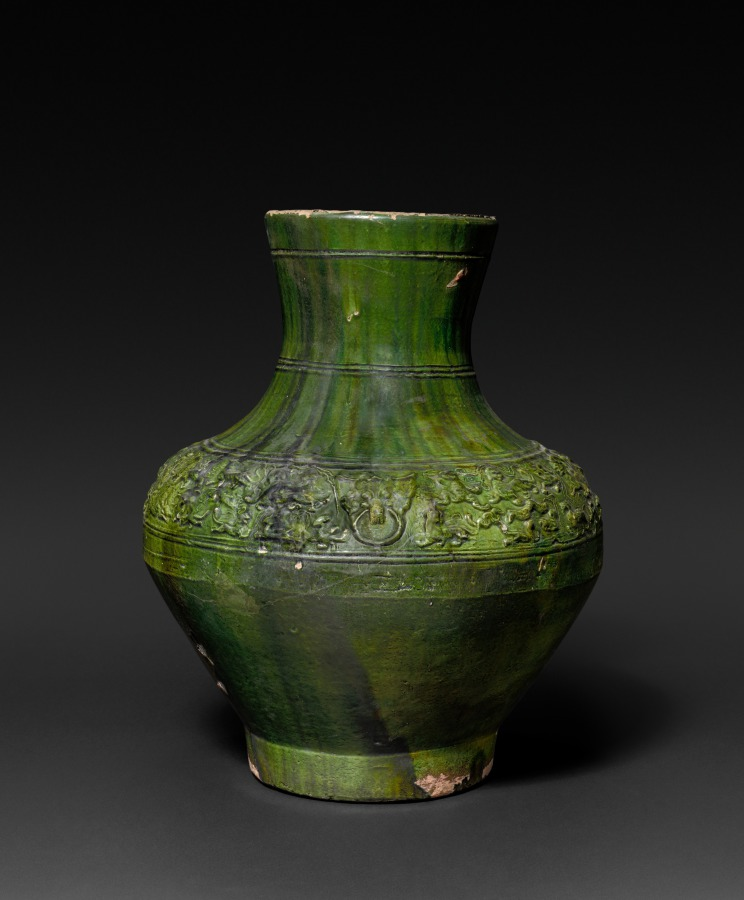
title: Large Jar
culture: China, Han dynasty (202 BCE–220 CE)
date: 206 BCE–220 CE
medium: earthenware with impressed and molded decoration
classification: Ceramic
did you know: The vase's earthenware body is covered with a cucumber-rind green glaze.